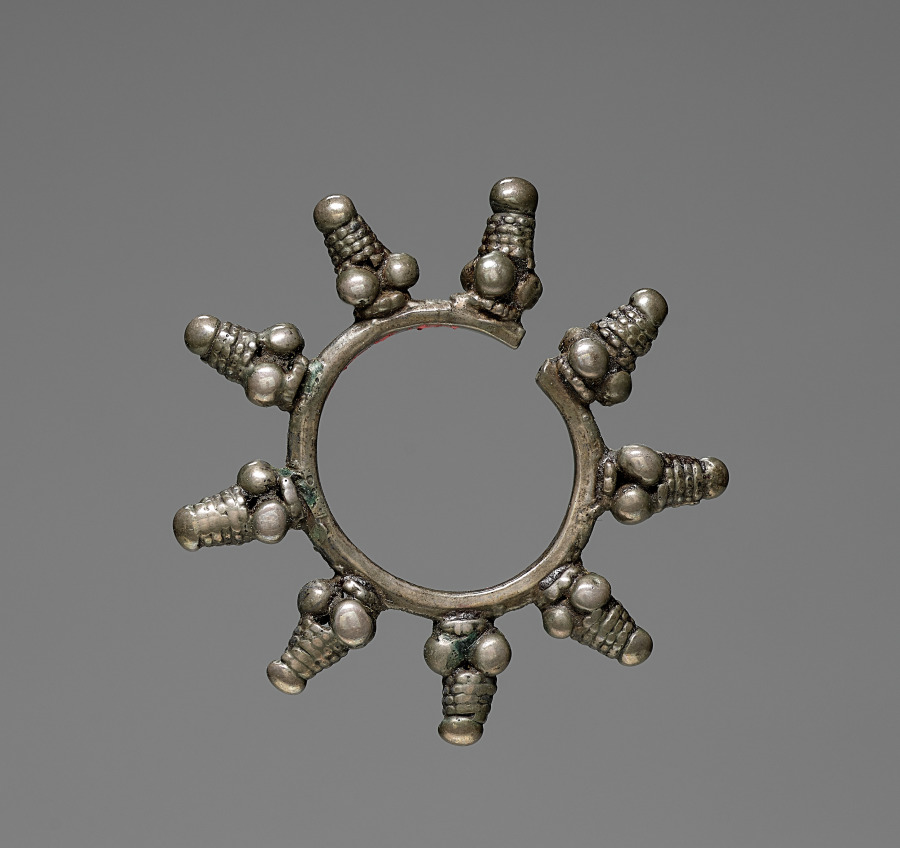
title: Earring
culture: India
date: 1800s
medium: silver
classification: Jewelry